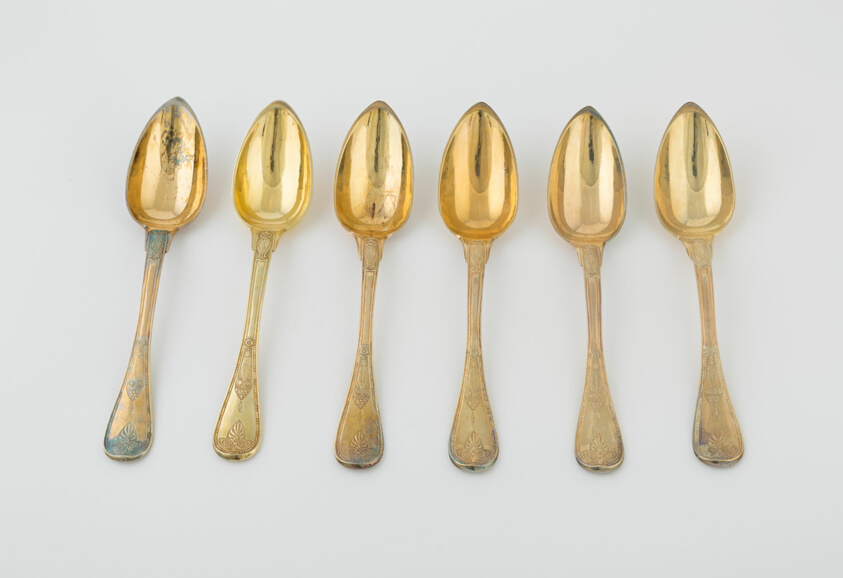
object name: Metalwork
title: Set of Tablespoons (10)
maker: Martin-Guillaume Biennais; French, 1764–1843; Pierre-Benoît Lorillon; French, 1757–1816; Paris, France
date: 1789–1820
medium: Silver gilt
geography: Paris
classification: silver; metalwork; european decorative arts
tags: Borghese Service